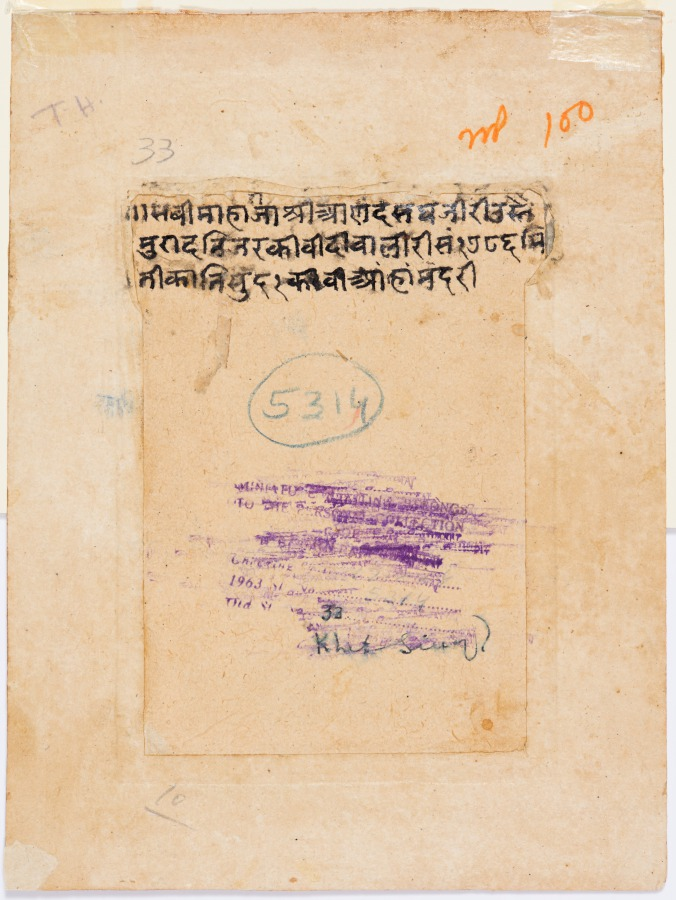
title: Maharaja Shri Anand Singh-ji and His Consort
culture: Northwestern India, Rajasthan, Rajput Kingdom of Bikaner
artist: Ustad Murad (Indian, active 1700s)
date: 1729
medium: Gum tempera, silver, and gold on paper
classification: Painting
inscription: sabī māhārājā śrī ānada sagaha jī rī ustai murāda nijara kīvī dīvālī rī saṃ[vata] 1786 mītī kāti suda 1 kīvī āṃhāṃmada rī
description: The artist used metallic paint to indicate the sumptuous materials of the carpet covered with roses that marks the place of the royal couple. The king affectionately slings one arm around the shoulders of his queen, who carelessly allows wine to flow out of the bottle. A gigantic indigo-and-gold cushion provides their backdrop, excluding their attendant. The blue and white arabesques in the spandrels—triangular spaces above the arch—point to the couple’s international sophistication; the elite in northwestern India imported blue-and-white Dutch tiles and Chinese porcelain.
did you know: The silver carpet marks the royal window where subjects can come to see him.